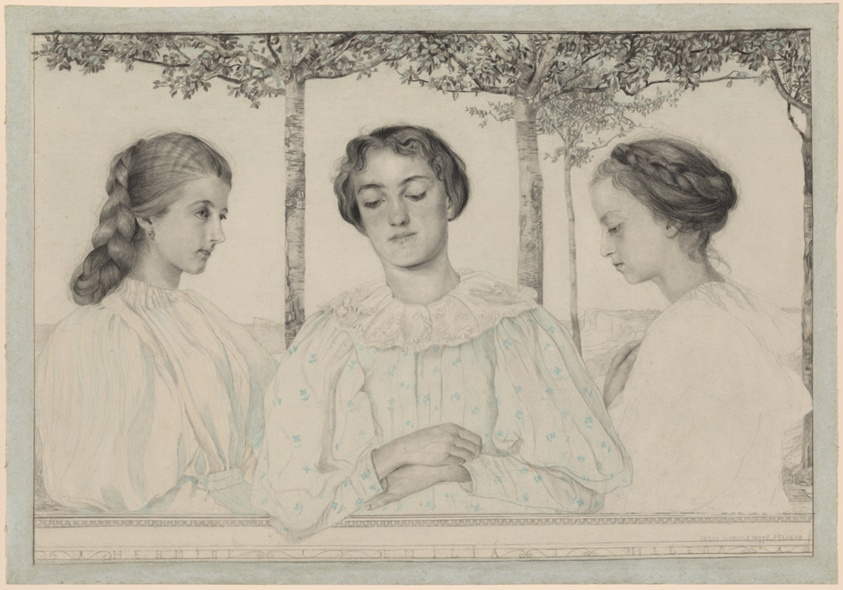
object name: Drawing and Watercolor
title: A Triple Portrait of Hermine, Emilia, and Helena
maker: Emilie Mediz-Pelikan (Austrian, 1861-1908)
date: 1897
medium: Colored pencil on blue wove paper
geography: Austria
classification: drawing; prints and drawing; paper; colored pencil